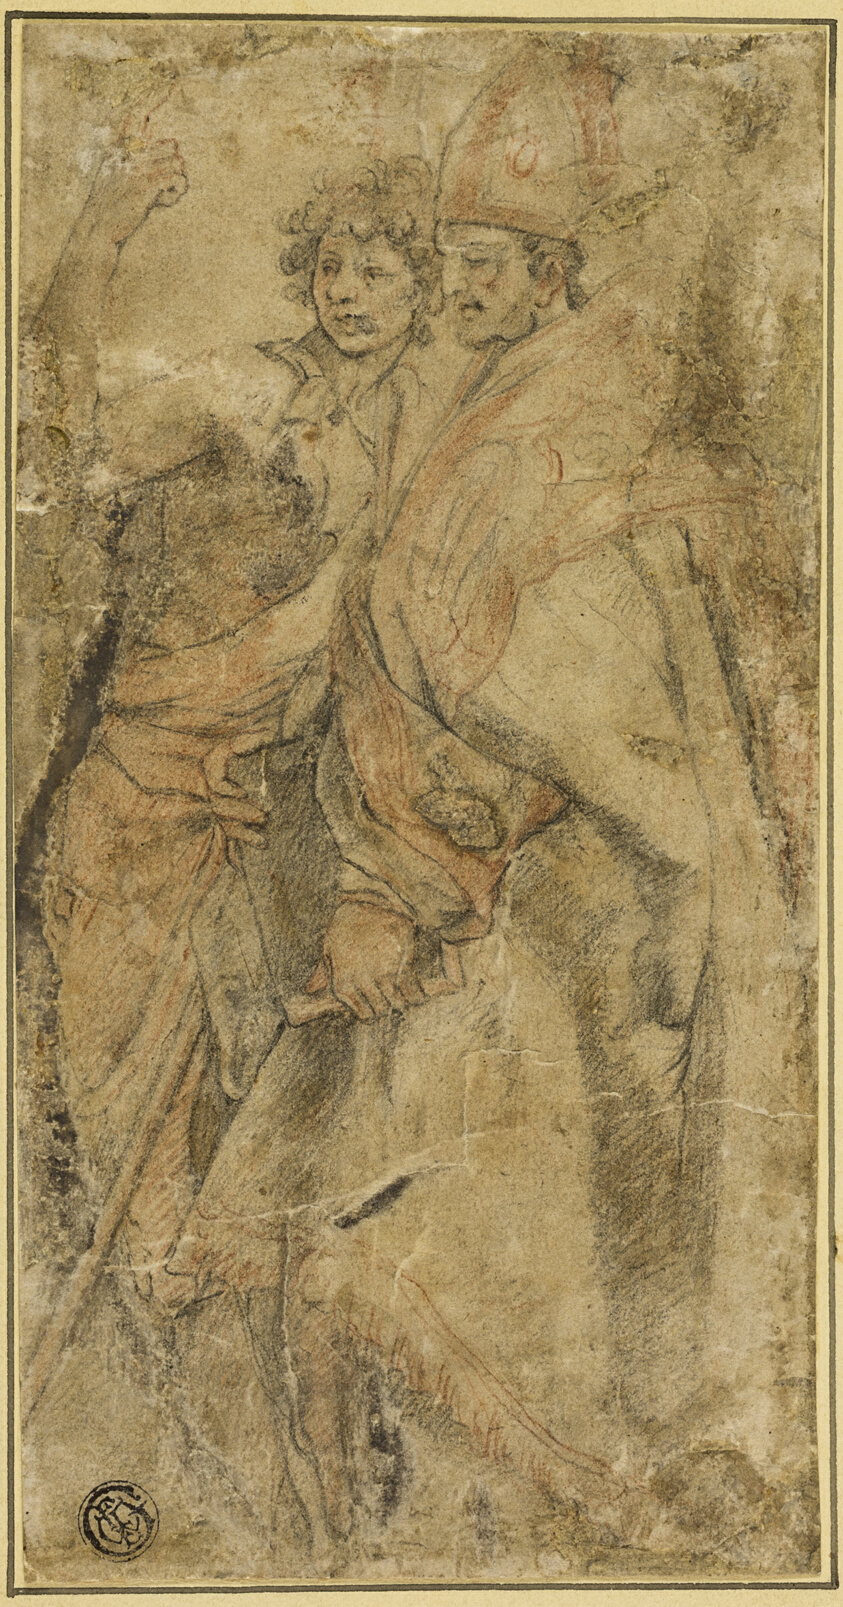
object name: Drawing and Watercolor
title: Saint John the Baptist and San Bernardo degli Uberti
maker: After Andrea del Sarto; Italian, 1486-1530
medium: Black and red chalk on tan laid paper, laid down on card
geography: Italy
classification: chalk; drawings (visual works); prints and drawing